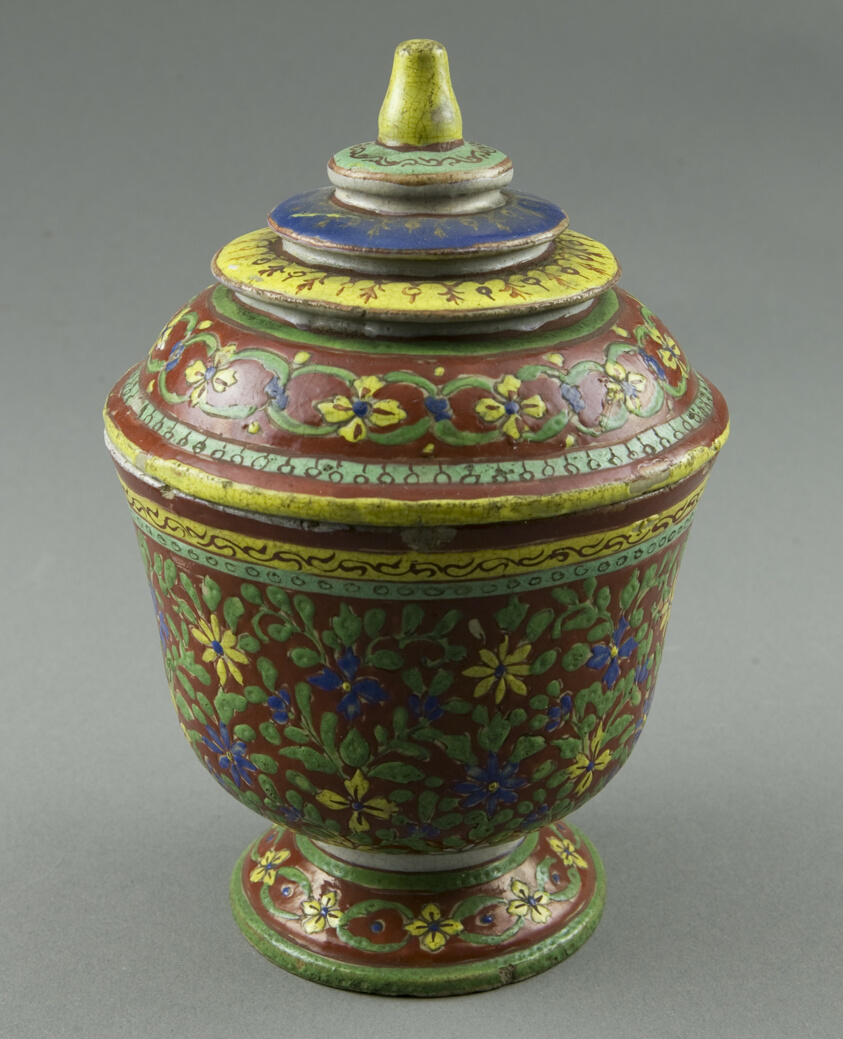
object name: Decorative Arts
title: Bencharong (Five-Colored) Ware Jar, with Tiered Cover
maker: China, for the Thai Market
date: 19th century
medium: Porcelain painted in overglaze polychrome enamels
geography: China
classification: porcelain; asian art; ceramics; decorative arts